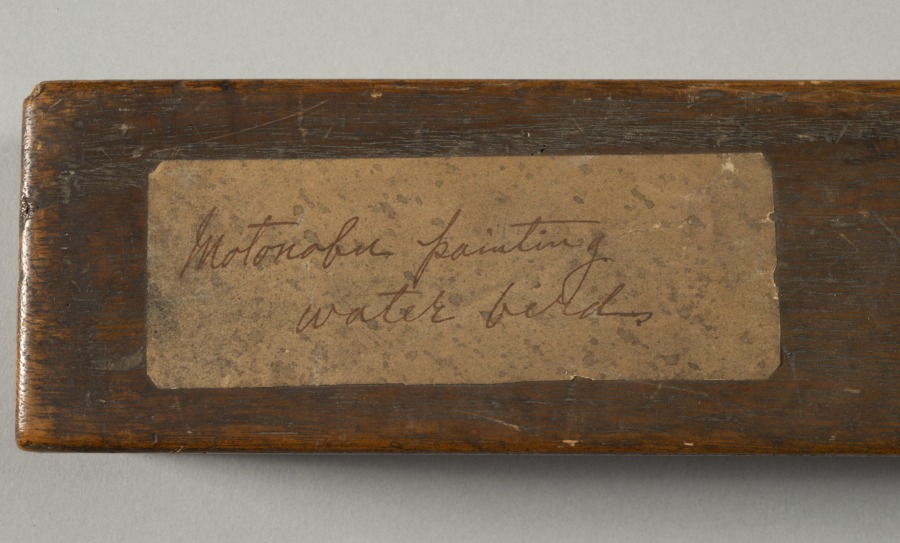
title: Ducks and Reeds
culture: Japan, Momoyama period (1573-1615) to Edo period (1615-1858)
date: early 1600s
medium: hanging scroll; ink on paper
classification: Painting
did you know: This painting was produced by a member of the Kano school.